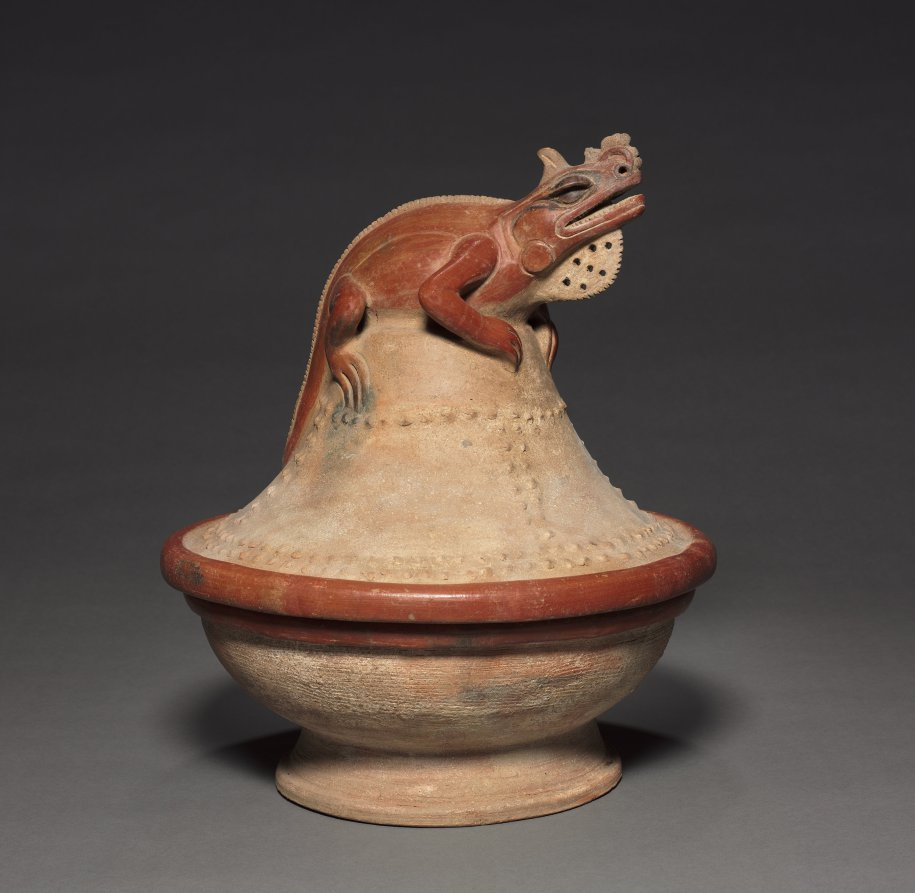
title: Lidded Bowl with Iguana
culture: Costa Rica, Southern Nicoya region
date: c. 600–1100 (Thermoluminescence date, 995–1395)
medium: ceramic, slip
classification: Ceramic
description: At the time of the Spanish conquest in the 16th century, Costa Rican mythology linked iguanas to the sky and to rulers. The earlier makers of this vessel left no written records, but they may have had similar beliefs. The lizard poses as though basking in the sun, a celestial body, and assumes an aggressive stance that could be likened to a ruler's: the teeth and chin under the dewlap are displayed, Also, fine ceramics like this were buried in the graves of the high-status dead, some of them certainly leaders of the several groups that competed in the area.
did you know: Green iguanas can grow to be over 6 feet long.